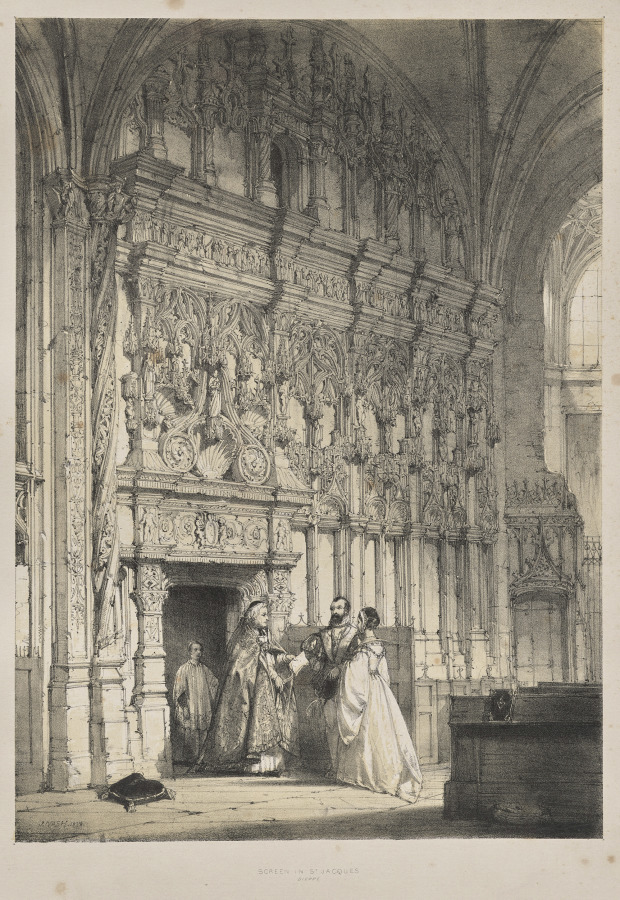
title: Architecture of the Middle Ages: Screen in St. Jacques, Dieppe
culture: England, 19th century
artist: Joseph Nash (British, 1808–1878)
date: 1838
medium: lithograph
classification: Print